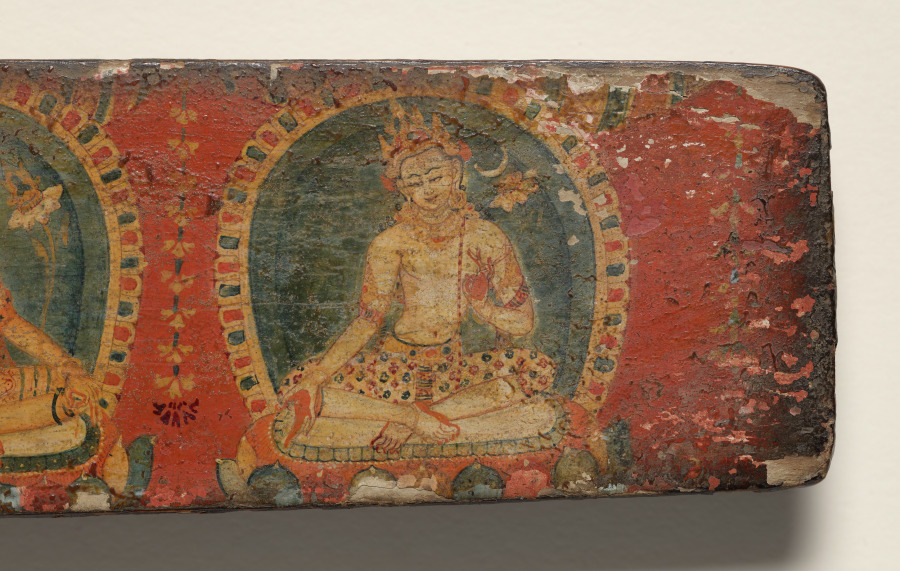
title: Four bodhisattvas and two attendants flanking Vajrasattva, bottom cover, from a Manuscript of the Perfection of Wisdom in Eight Thousand Lines (Ashtasahasrika Prajnaparamita-sutra)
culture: Eastern India, Bihar, Vikramashila Monastery. Painting: Nepal, Kathmandu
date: Sunday, September 14, 1119 (year 239 of the Newar Samvat in the month of Ashvina)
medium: Gum tempera, paper, and colors on wood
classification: Painting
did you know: The diamond pattern at the holes references the ribbons and cords that would have bound the book together.